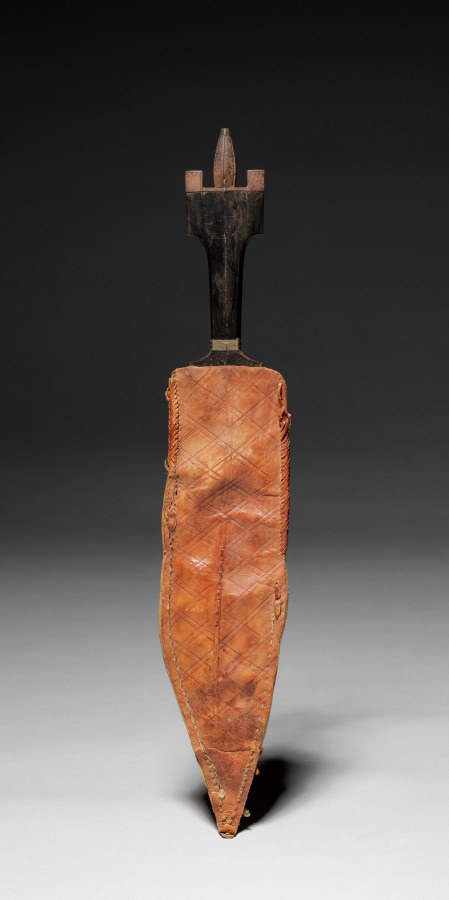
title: Knife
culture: Africa, East Africa, Somalia, unknown maker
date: early 1900s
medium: Iron, rawhide or leather, and horn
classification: Arms and Armor